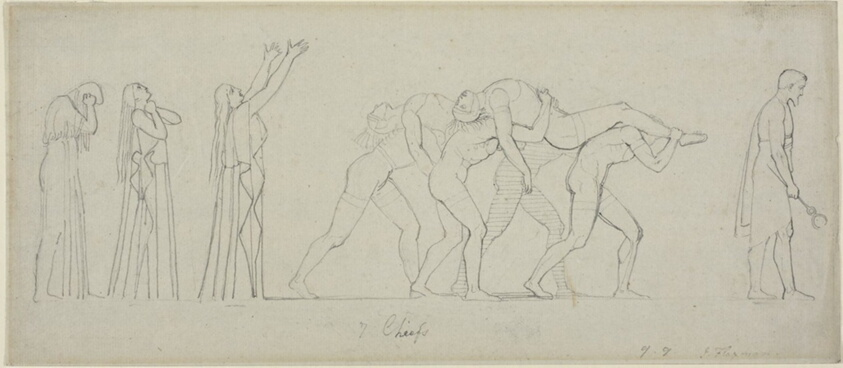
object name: Drawing and Watercolor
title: Seven Chiefs Against Thebes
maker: John Flaxman, II; English, 1755-1826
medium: Pen and gray ink, over graphite, on gray laid paper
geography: England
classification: pen and ink drawings; drawings (visual works); prints and drawing